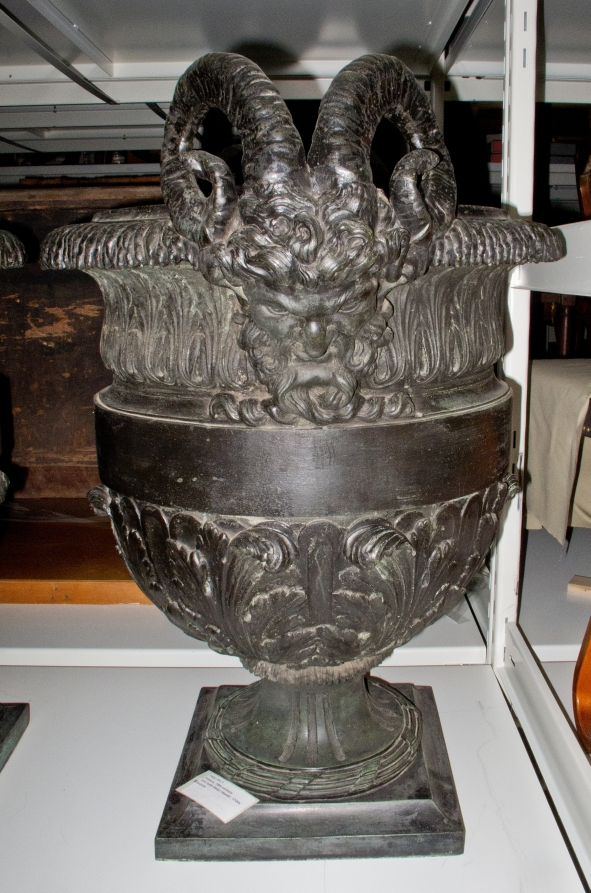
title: Urn with Satyr Heads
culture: France, 18th century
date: 1700s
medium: bronze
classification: Metalwork